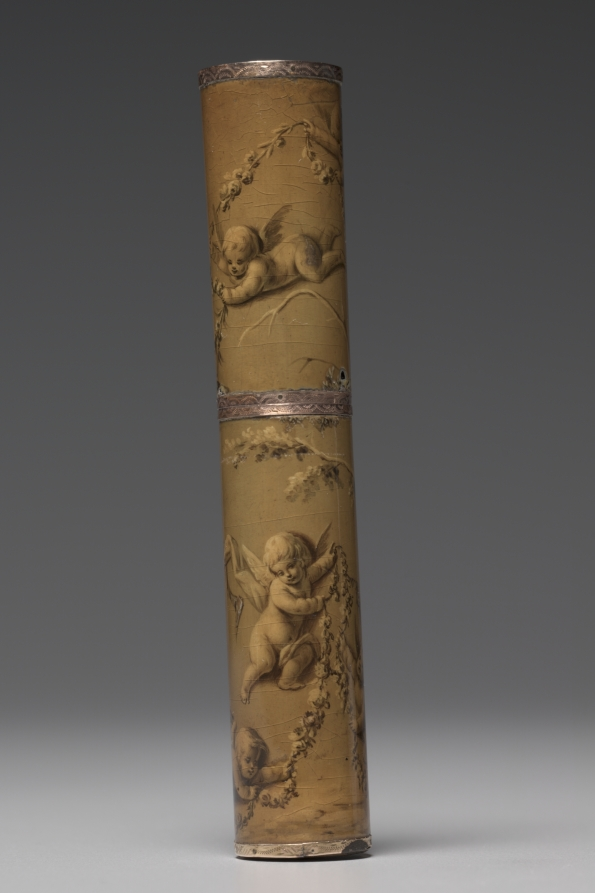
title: Needle Case (Etui à Aiguilles)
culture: France, Paris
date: 1768–69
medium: painted wood, gold mounts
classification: Miscellaneous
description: The material of cases like these delineated the status of the holder. More expensive materials such as ivory, tortoiseshell, or silver were reserved for wealthier users while more common cases were made of lacquered papier-mâché or wood. This wooden case is decorated with vernis martin, a domestic varnish imitating East Asian true lacquer. The sinuous lines, floral garlands, and putti, personifications of love in the form of winged infants, exemplify typical rococo imagery.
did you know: In the 1500s these cases were commonly fabricated to hold pins and needles for master tailors, but became more widely produced for women during the 1700s.